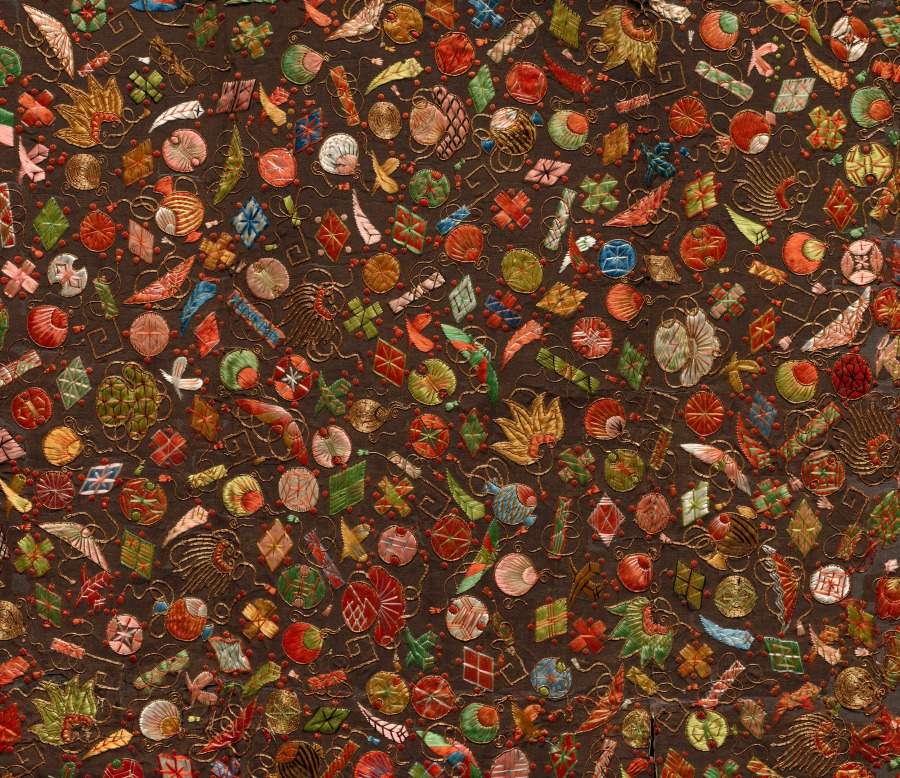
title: Embroidered Strip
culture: Japan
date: late 1800s-early 1900s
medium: embroidery; silk and gold thread on silk ground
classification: Embroidery